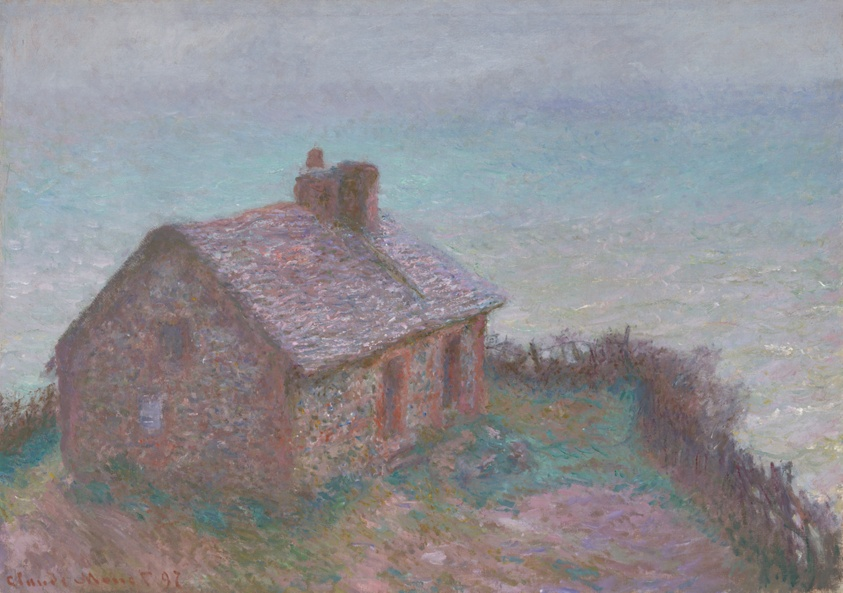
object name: Painting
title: The Customs House at Varengeville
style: Impressionism, nineteenth century, 19th century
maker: Claude Monet (French, 1840–1926)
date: 1897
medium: Oil on canvas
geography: France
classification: painting; french; oil paintings (visual works); oil on canvas; paint; european painting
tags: landscapes, hills, France, building, weather/seasons, water, Century of Progress, world's fairs, Chicago World's Fairs